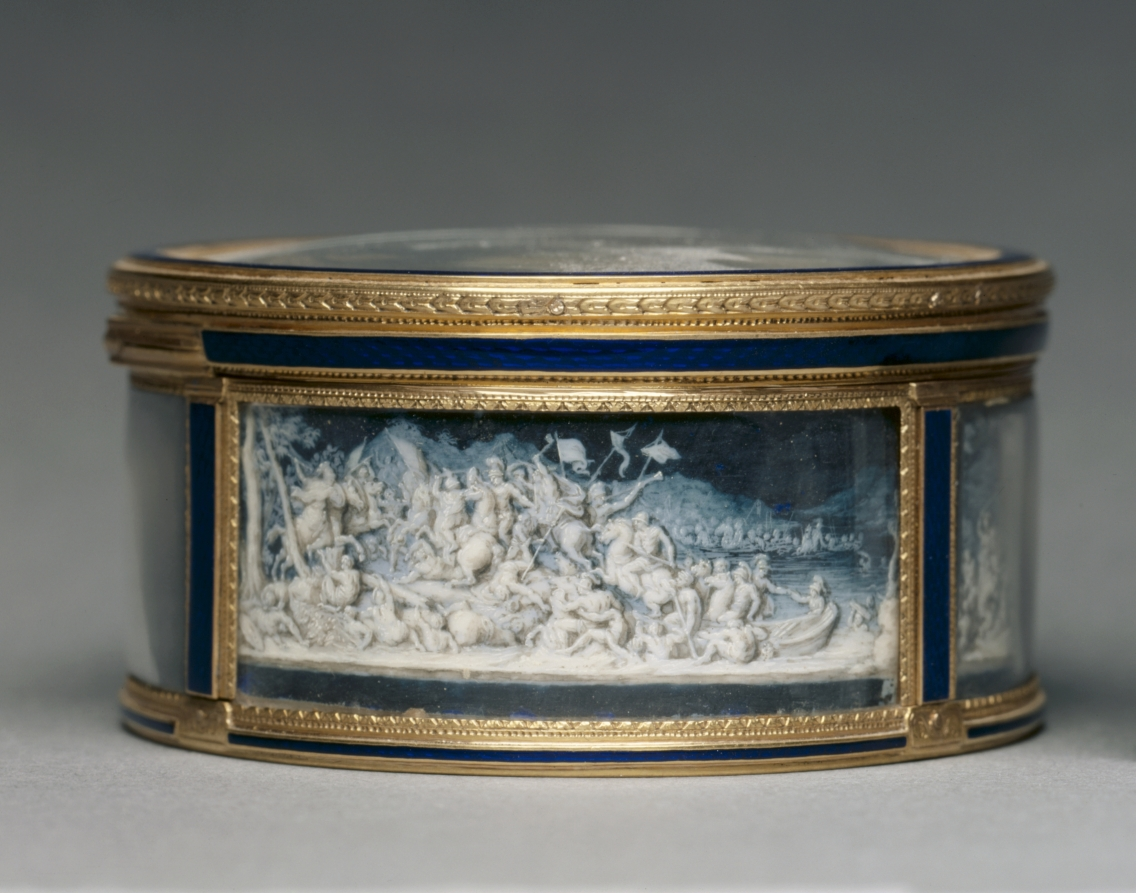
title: Snuff Box (Tabatière)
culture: France, 18th century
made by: Pierre Marie Gault De Saint-Germain (French, 1754–1842)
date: 1779–80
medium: gold and enamel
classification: Miscellaneous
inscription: [Warden's mark for Paris, 1779-1780, inside bottom; inside cover]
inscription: [Illegible maker's mark, inside bottom; inside cover]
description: Decorated with images derived from ancient Greek and Roman history in the style of cameos, intricately carved gemstones, this box evokes the rising neoclassical imagery in France. The scenes on the box recount several key events in the life of Alexander the Great. The enameled works were inspired by a series of prints by Sébastien Leclerc which drew from a series of paintings by Charles Le Brun.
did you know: The original series painted by Charles Le Brun, The Battles of Alexander (Les Batailles d’Alexandre) (1600s), was commissioned by King Louis XIV of France.